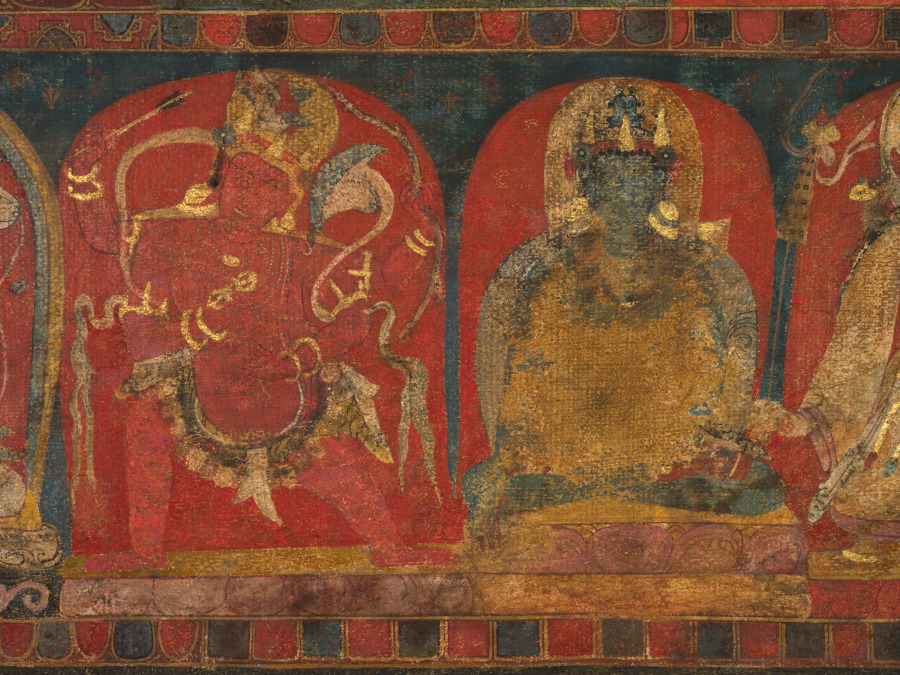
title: Tantric Buddha Vairochana as Vajrasattva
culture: Central Tibet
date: c. 1150–1200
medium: gum tempera, ink, and gold on cloth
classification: Painting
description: The seated Buddha dominating the composition is identified as Vairochana because of his hand gesture, the mudra communicating supreme enlightenment in which the index finger of one hand is grasped by the fingers of the opposite hand. His golden color and the tiny vajra—a six-pronged ritual object representing a thunderbolt—balanced on top of his finger suggest that he is in the guise of Vajrasattva, the summation of all enlightened beings. In his crown is the image of a monk, who is probably the guru of the donor, the small monastic figure at the lower right next to the lotus pedestal.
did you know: A mantra written behind the figures invokes their living presence in the thangka painting.